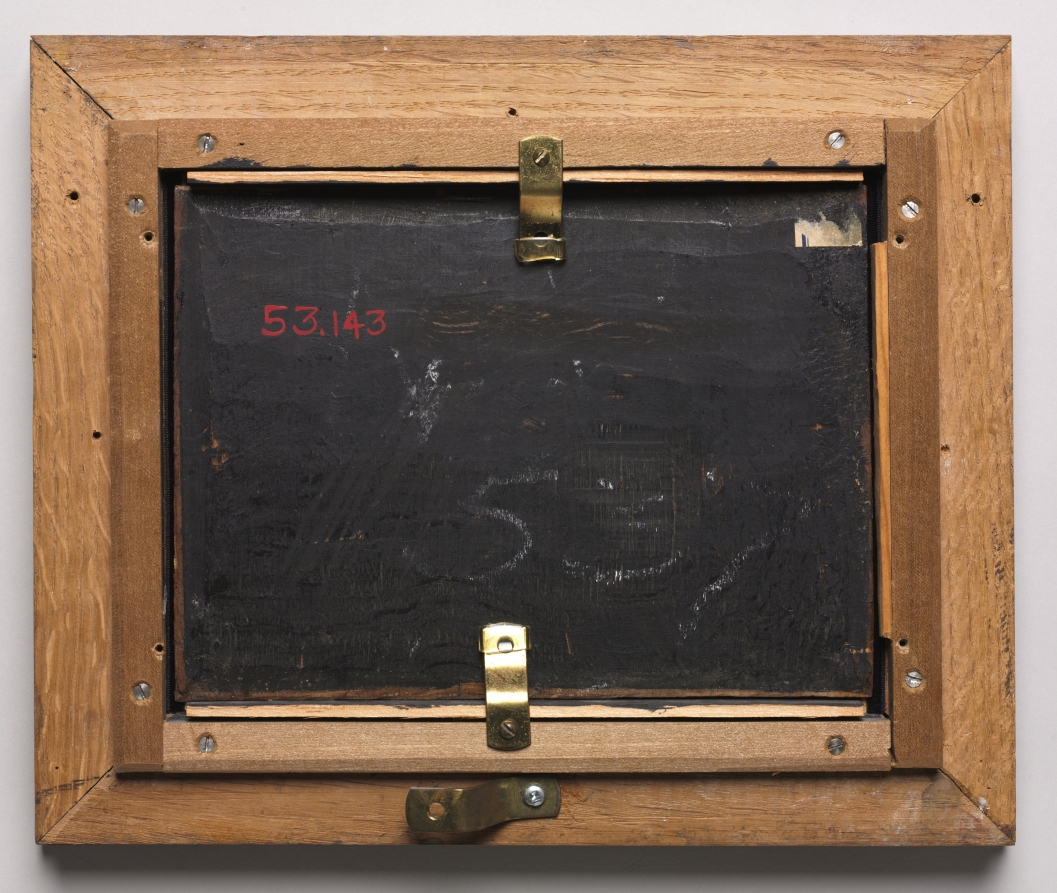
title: The Baptism of Christ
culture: Germany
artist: Lucas Cranach (German, 1472–1553)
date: 1530s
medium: oil on wood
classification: Painting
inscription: Inscribed at top center: HIC EST FILIVS MEVS DILECTVS IN QVO/MICHI BEN COMPLACITVM EST.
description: Painted in minute detail, Cranach’s majestic scene includes elements characteristic of landscapes in 16th-century German art: verdant forest, hilltop city, and distant mountains. A close associate of Protestant reformer Martin Luther, Cranach adapted Christian imagery to reflect Luther’s belief that religious art must narrate scripture. The Gospels describe Christ’s baptism with the heavens opening, a dove descending, and a voice saying, “Here is my beloved son, with whom I am well pleased,” which Cranach painted in Latin directly onto the clouds.